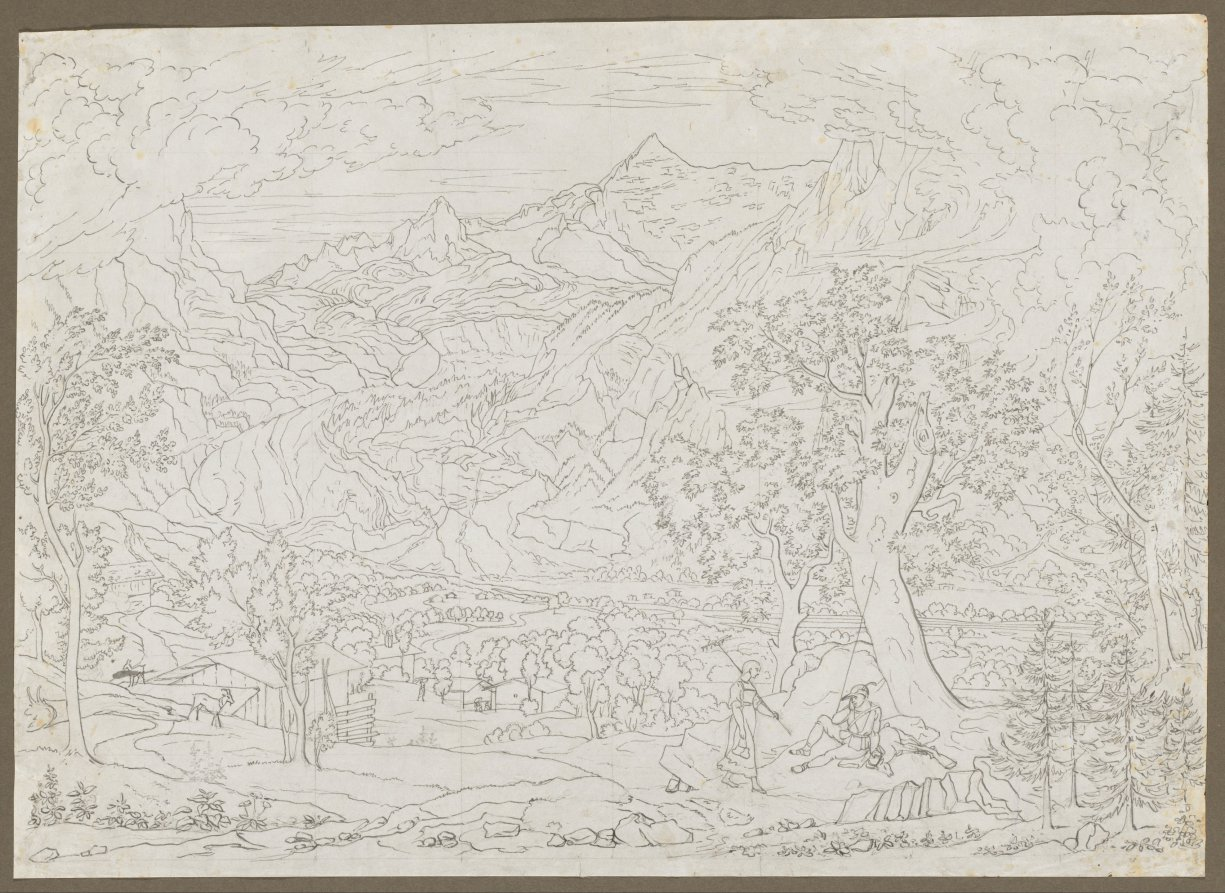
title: The Grindelwald Glacier with Hunter and Peasant Girl in Foreground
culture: Austria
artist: Joseph Anton Koch (Austrian, 1768–1839)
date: c. 1823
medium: pen and gray ink over graphite, squared in graphite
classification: Drawing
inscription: VERSO, upper left, in graphite: 20/600 ; upper right, in graphite: 3 [circled] ; lower left, in graphite: Ar[illegible] ; lower right, in graphite: 121 [underlined and sideways]